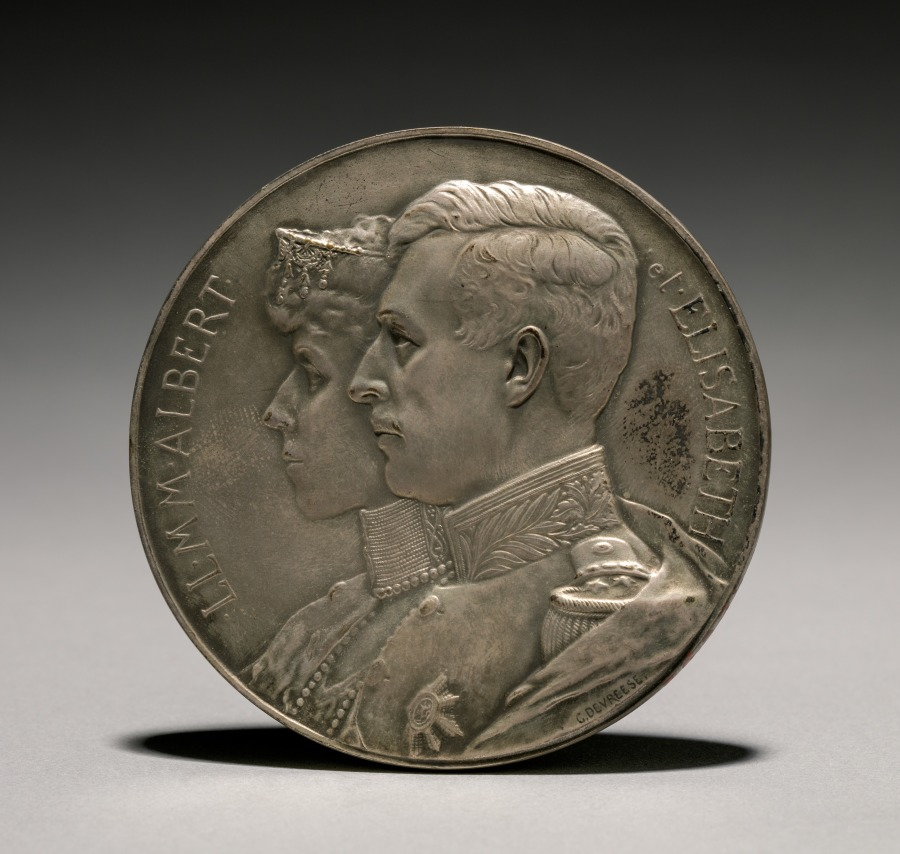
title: Medal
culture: Belgium, early 20th century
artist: Godefroid Devreese (Belgian, 1861–1941)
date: 1914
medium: bronze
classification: Metalwork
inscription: obverse - "LL.MM.ALBERT et ELISABETH"; signed: "G. Debreese." reverse - "Generosite -- Amerique. Belgique -- Gratitude"; signed: "1914 G. Devreese."